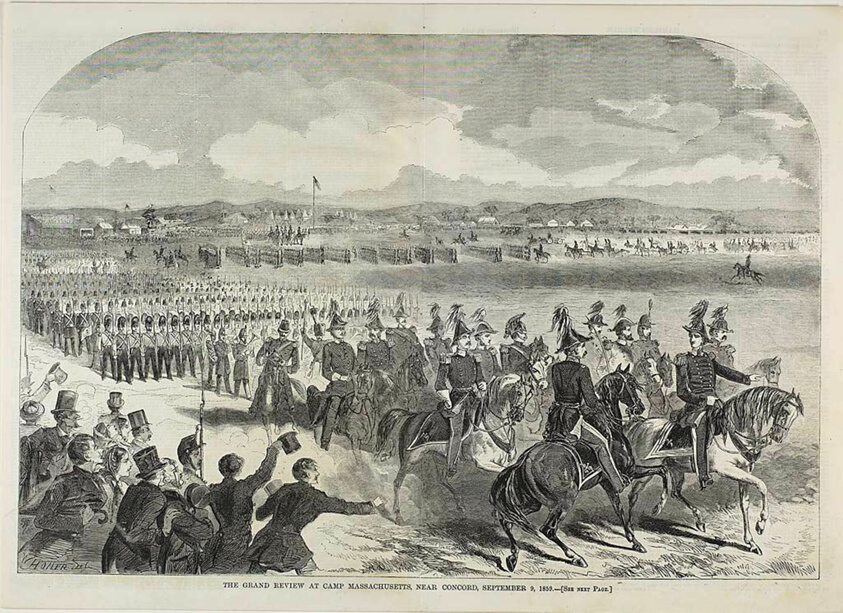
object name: Print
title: The Grand Review At Camp Massachusetts, Near Concord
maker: Winslow Homer (American, 1836-1910); published by Harper's Weekly (American, 1857-1916)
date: published September 24, 1859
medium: Wood engraving on paper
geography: United States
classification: wood engraving; print; prints and drawing